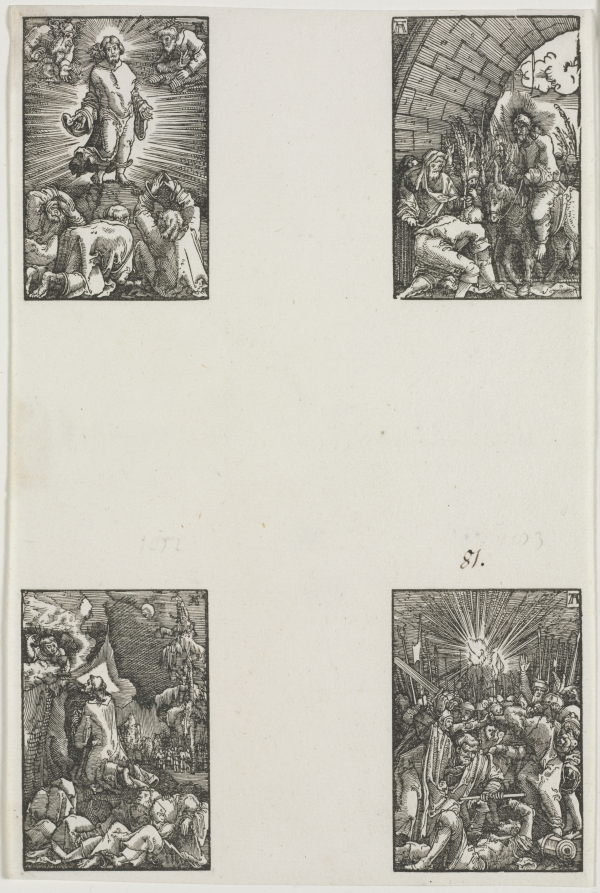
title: The Fall and Redemption of Man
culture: Germany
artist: Albrecht Altdorfer (German, c. 1480–1538)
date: c. 1515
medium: woodcut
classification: Print